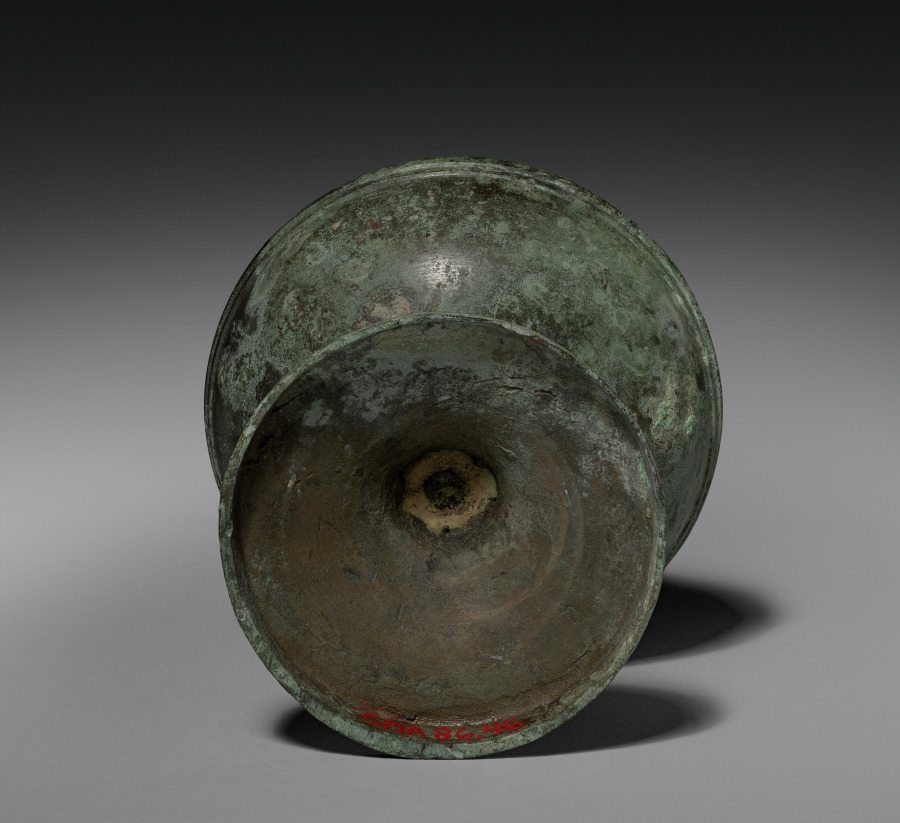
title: Incense Burner (Boshan Lu)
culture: China, Western Han dynasty (206 BCE–8 CE)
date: 200–100 BCE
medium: bronze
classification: Metalwork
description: The conical cover of this incense burner represents a miniature mountain with hunting scenes. The cover was shrouded in mist and emanated intoxicating smoke through its openwork when fragrant woods and herbs were burnt in its stem cup, transporting its beholder into an imaginative realm.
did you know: Deities (appearing as hunters) and fantastic beasts roam freely among mists and clouds on this incense burner.